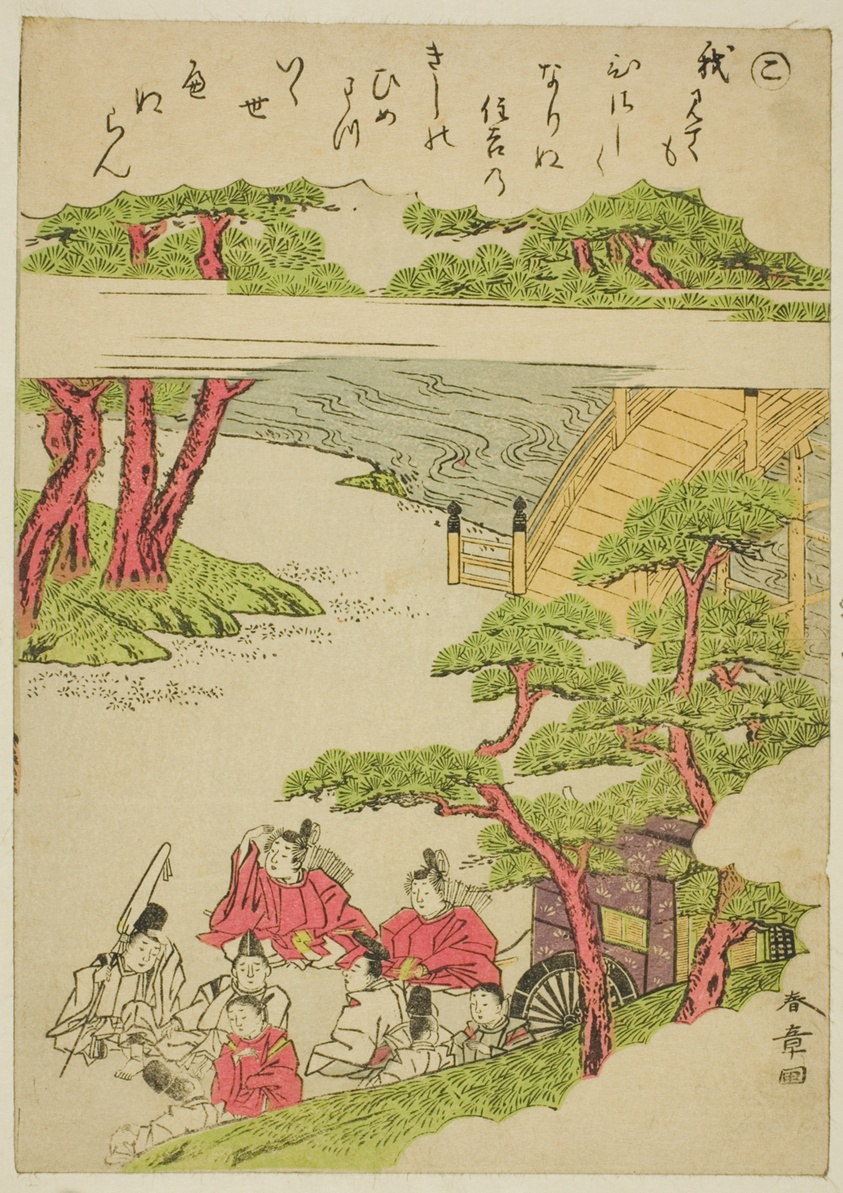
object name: Print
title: "Ko," from the series "Tales of Ise in Fashionable Brocade Pictures (Furyu nishiki-e Ise monogatari)"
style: Japanese (culture or style)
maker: Katsukawa Shunsho 勝川 春章; Japanese, 1726-1792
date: c. 1772/73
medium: Color woodblock print; koban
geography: Japan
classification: woodblock print; print; asian art